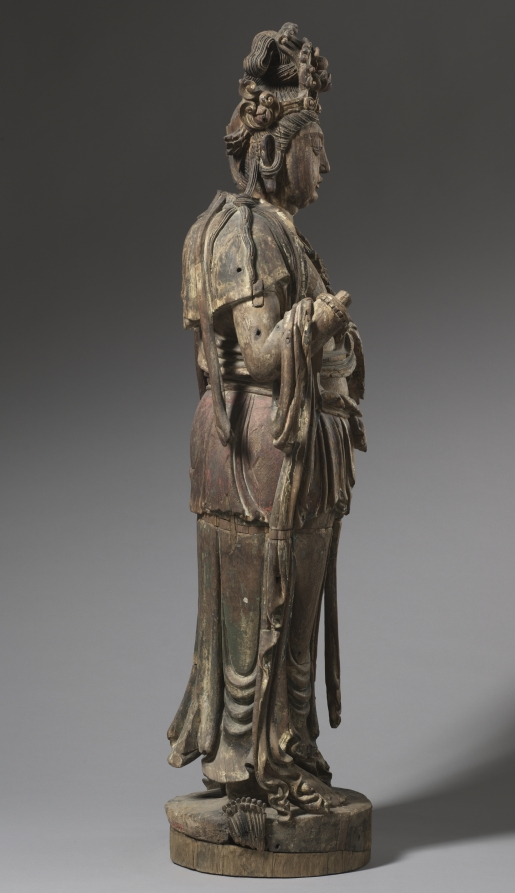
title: Standing Bodhisattva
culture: China, Jin dynasty (1115-1234)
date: 1200s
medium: wood with traces of polychromy and gold leaf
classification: Sculpture